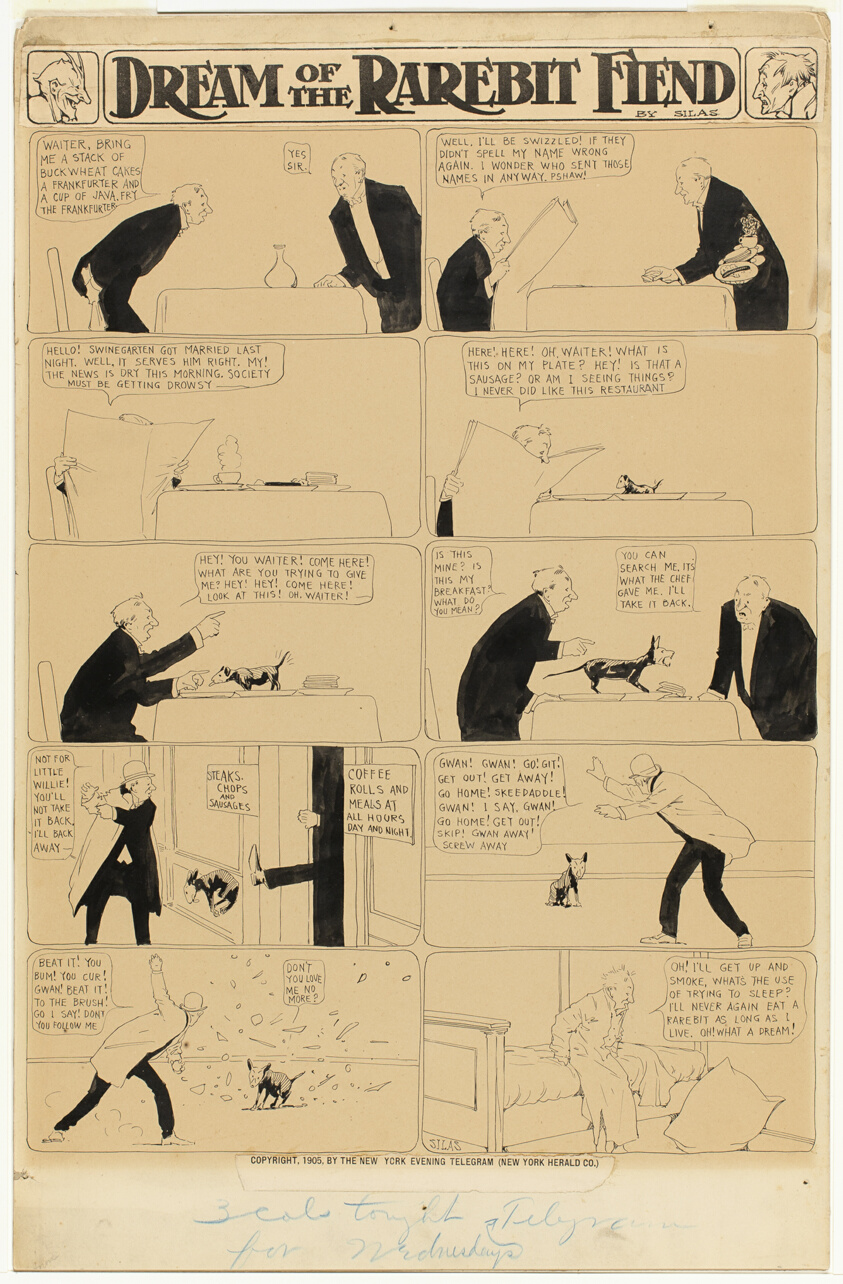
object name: Drawing and Watercolor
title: Dream of the Rarebit Fiend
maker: Winsor McCay (American, 1871-1934); later published by New York Evening Telegram (New York Herald Company; American, founded 1867)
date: 1905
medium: Pen and brush and black ink on ivory illustration board with lithographed title header and printed copyright label pasted down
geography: United States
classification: pen and ink drawings; brush and ink; drawings (visual works); prints and drawing